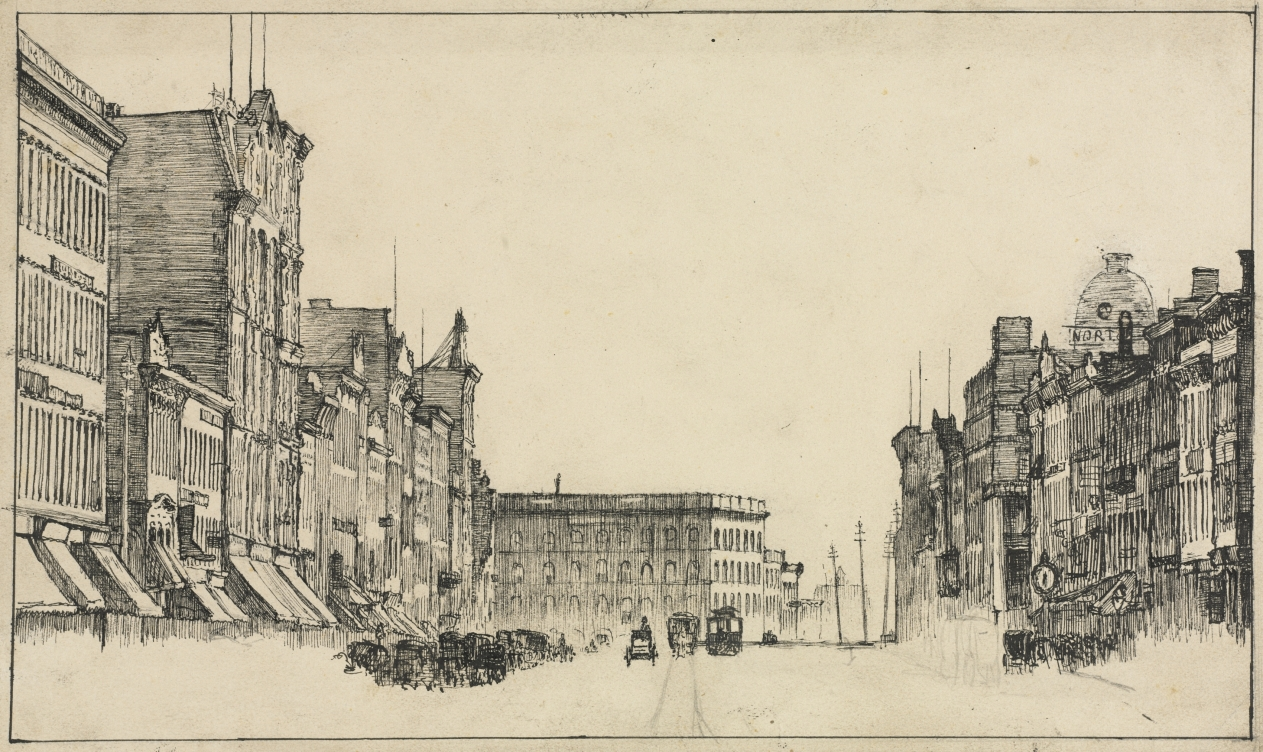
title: Downtown, Cleveland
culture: America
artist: Otto H. Bacher (American, 1856–1909)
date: c. 1870–1909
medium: ink on paper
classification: Drawing